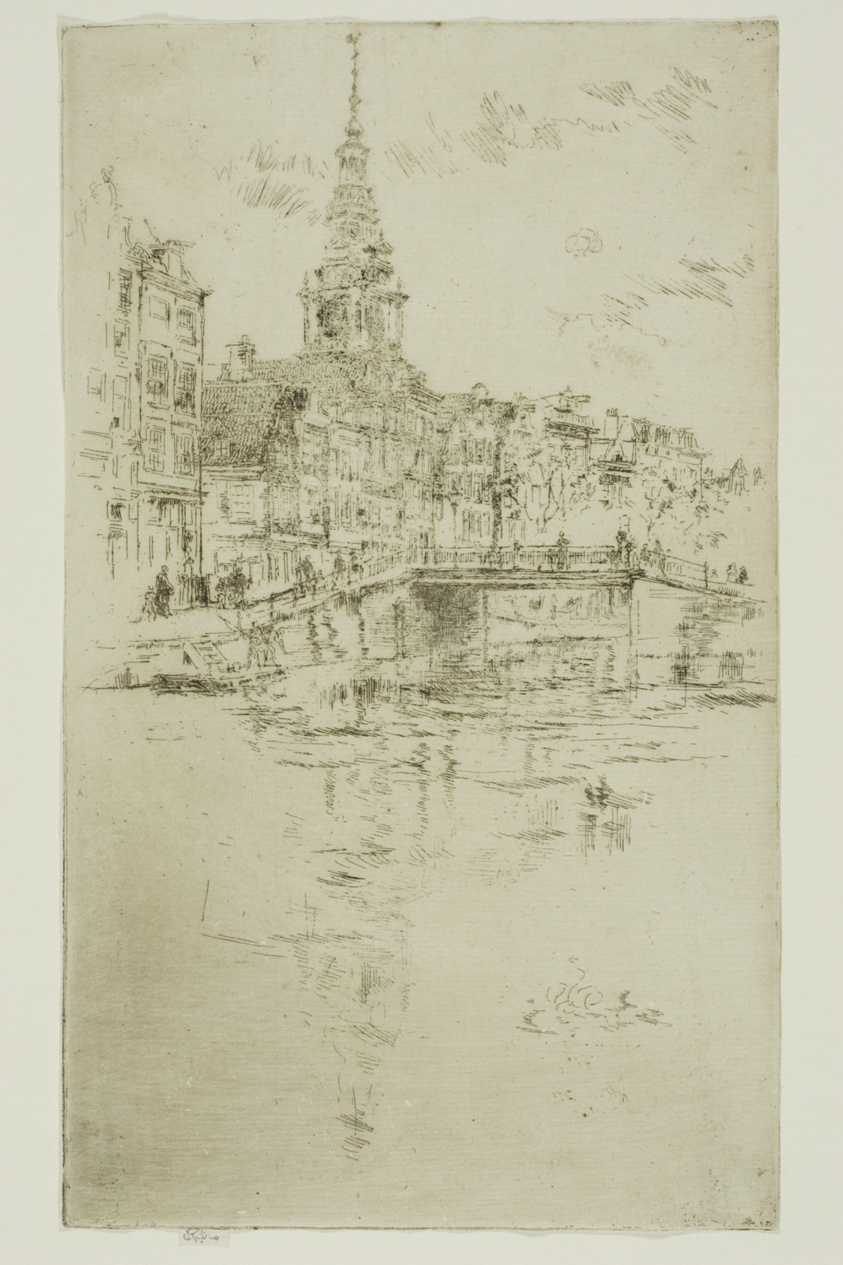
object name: Print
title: Church, Amsterdam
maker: James McNeill Whistler (American, 1834-1903)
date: 1889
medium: Etching with foul biting in black ink on ivory laid paper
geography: United States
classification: etching; foul biting; print; prints and drawing; paper